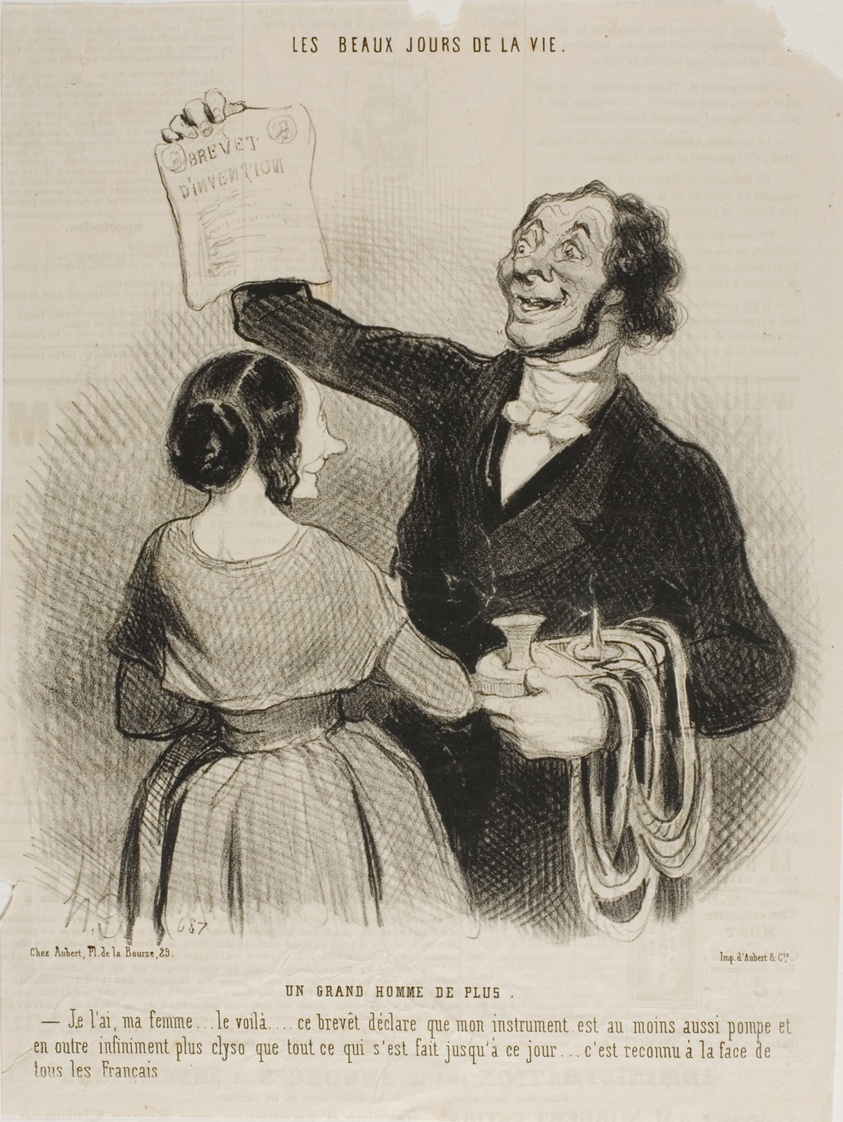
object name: Print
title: Another Great Man. “I have it in my hand, my dear... here it is in writing.... this document confirms that my invention is a well-pumped and infinitely more clysterized machine than anything invented thus far... all Frenchmen must accept that,” plate 36 from Les Beaux Jours De La Vie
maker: Honoré Victorin Daumier; French, 1808-1879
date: 1844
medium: Lithograph in black on ivory wove paper, with letterpress verso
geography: France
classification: lithograph; print; prints and drawing